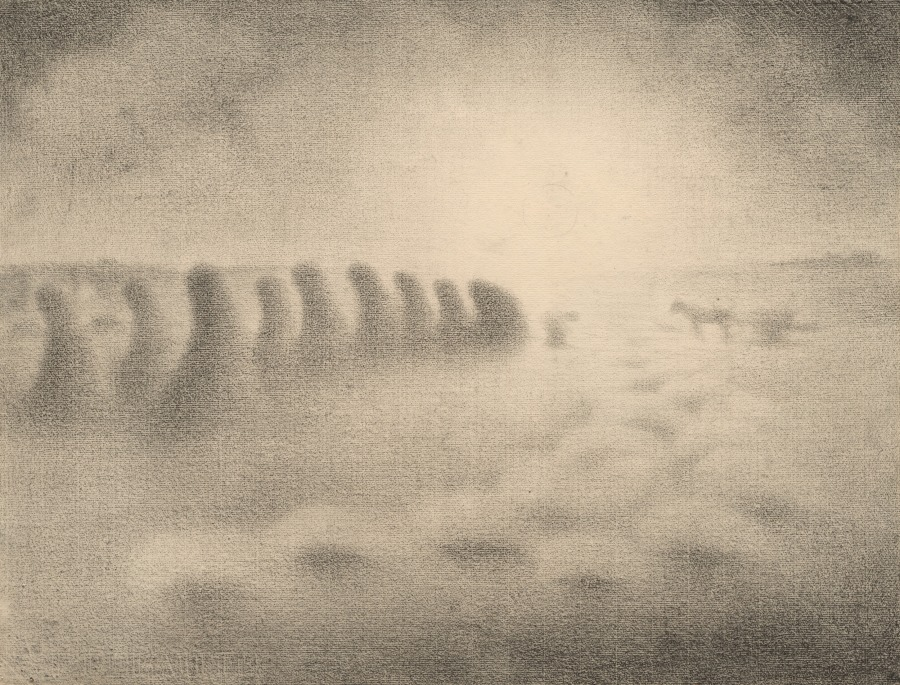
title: End of the Harvest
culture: France, 19th century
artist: Charles Angrand (French, 1854–1926)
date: c. 1892–1905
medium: charcoal on cream laid paper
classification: Drawing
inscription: watermark, lower left: BERVILLE (in reverse); watermark, upper right: Lalanne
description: This drawing's unusual technique reflects the ideas of the French painting movement known as Pointillism or Divisionism. Its most famous practitioner, Georges Seurat (1859–1891), developed a technique of applying color in short strokes or dots. Seurat's friend Charles Angrand was influenced by this method, and both artists developed a related technique for their drawings. In the sheet shown here, Angrand used a black, manufactured charcoal stick on a paper textured with tiny ridges. The highest of these ridges hold the charcoal, but the paper shows through in the small spaces between them. This creates the effect of a soft, diffuse evening light that dissolves the curved shapes of haystacks and turns the landscape into an expansive abstraction of nature.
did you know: The artist Paul Signac, a friend of Angrand, described the artist's drawings as "poems of light."